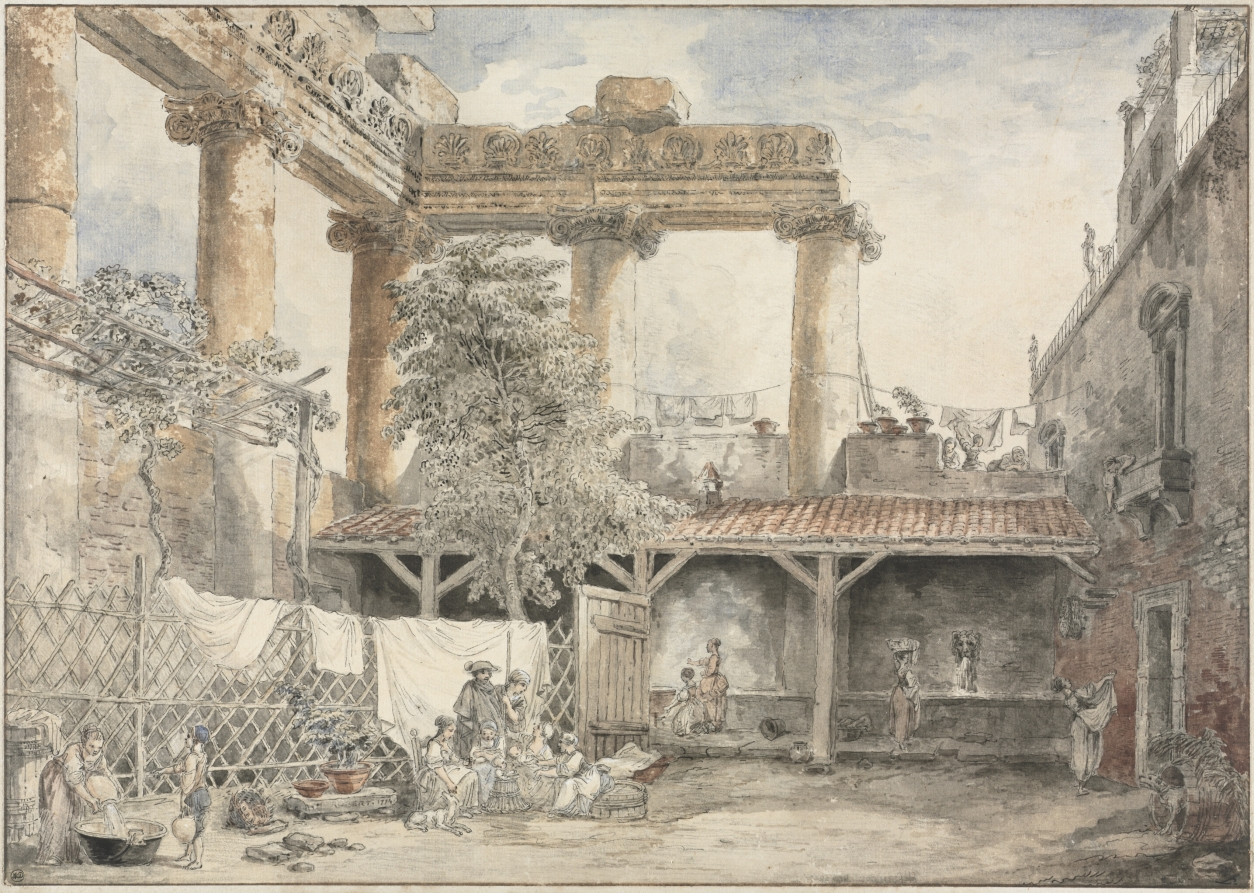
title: Roman Ruins, Villa Pamfili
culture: France, 18th century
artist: Hubert Robert (French, 1733–1808)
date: 1774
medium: Pen and black ink and watercolor with black chalk underdrawing and heightened with white gouache on cream laid paper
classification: Drawing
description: While living in Italy, Robert developed a fondness for classical architecture, making countless drawings that served as the basis for paintings and prints for decades after he returned to Paris. Denis Diderot (1713–1784), a French philosopher and art critic, nicknamed the artist “Robert of Ruins” due to Robert’s enduring interest in the subject. A quaint commentary on the passage of time, this drawing portrays the activities of contemporary life among the weathered remains of an ancient Roman building. Despite the traditional title of the drawing, there is no evidence that such ruins ever existed at the Villa Pamphili. The towering columns supporting a decorative frieze may instead derive from the Roman Forum’s Temple of Saturn.